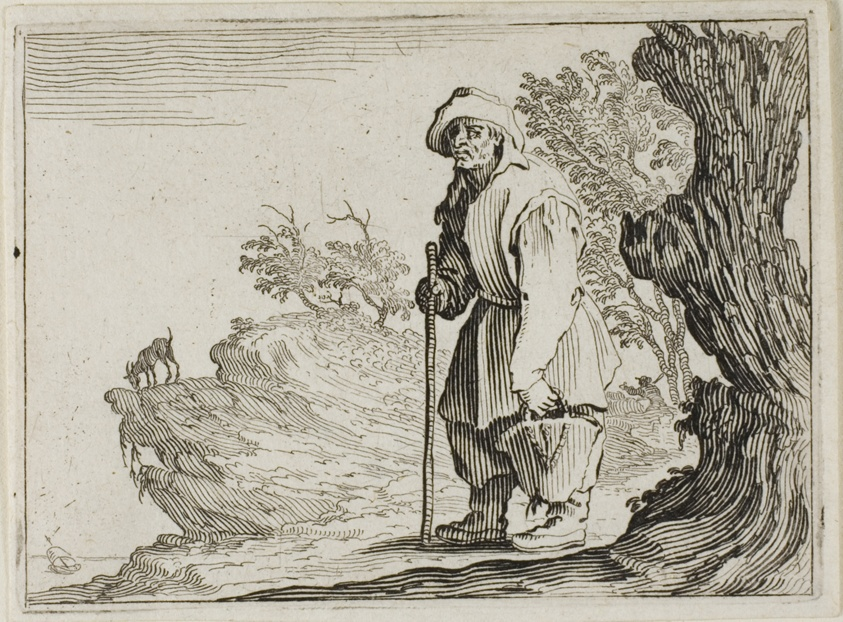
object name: Print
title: The Peasant Carrying his Bag, from The Caprices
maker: Jacques Callot (French, 1592-1635)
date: c. 1622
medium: Etching on ivory laid paper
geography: France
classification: etching; print; prints and drawing